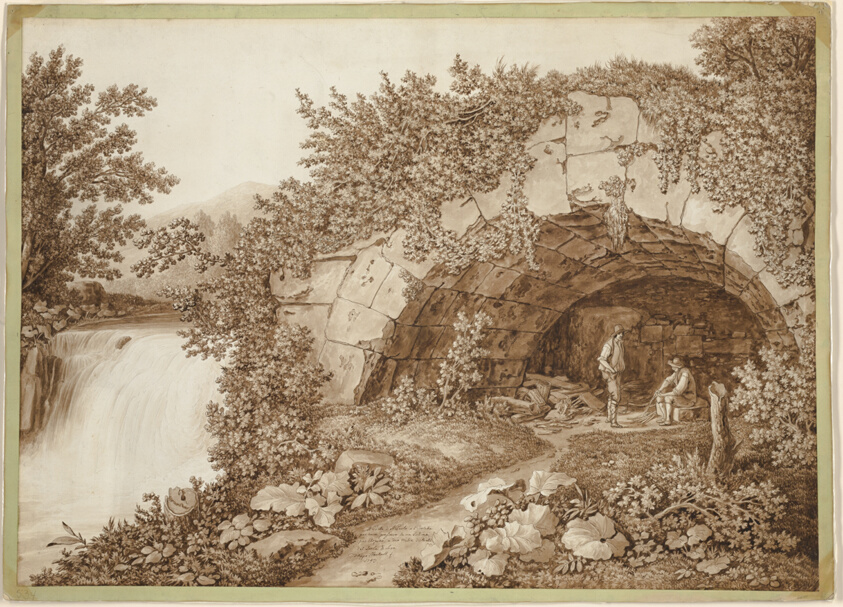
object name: Drawing and Watercolor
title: The Bridge of San Paolo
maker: Jacob Philipp Hackert (German, 1737-1807)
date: 1793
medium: Pen and brown ink and brush and various brown washes over graphite on ivory laid paper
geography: Germany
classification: pen and ink drawings; prints and drawing; paper